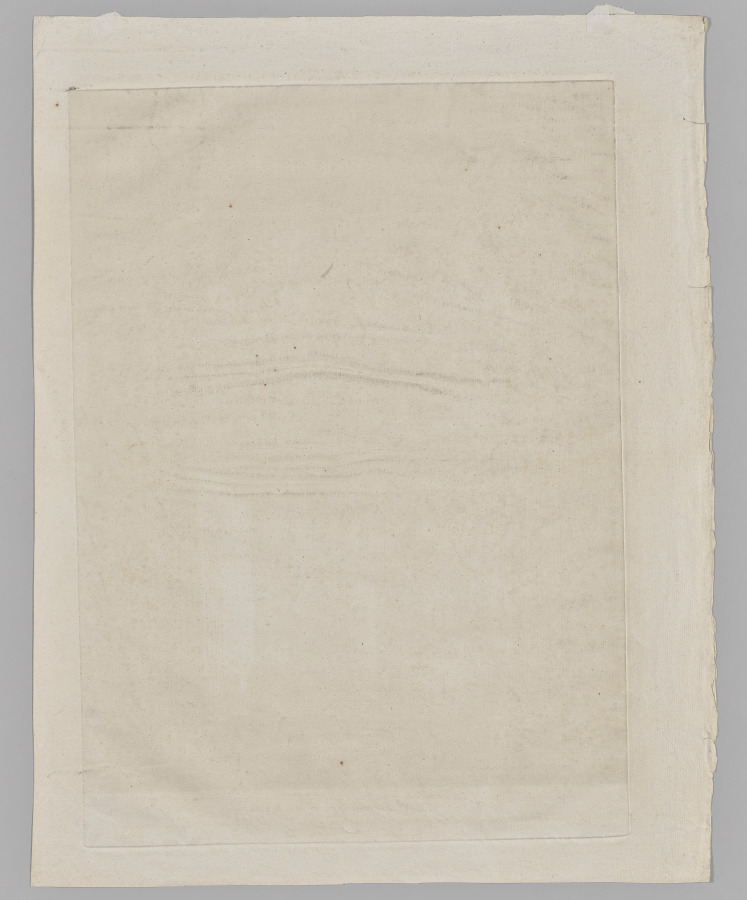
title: A View of the Vestibule of St. Peter at Rome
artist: Georges Francois Blondel (French, 1730–1800)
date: 1766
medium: mezzotint printed in sepia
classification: Print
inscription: Imprinted on recto: “A View of the Vestible ulf St. Peter at Rome”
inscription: Imprinted on recto: “G F Blondel Delin & Sculp”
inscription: Imprinted on recto: “To the Rt Hon’ble Elizabeth Countess of Northumberland This Plate is most Humbly Dedicated by her Ladyships most humble serv’t/Published according to Act by G F Blondel Panton Street/G F Blondel/Plate 3”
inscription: Watermark: Grand-Jésus stock of T. Dupuy, watermark Name of Jesus (IHS), countermark T Dupuy Fin Auvergne 1742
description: After returning from several years spent in Italy, the French printmaker George-Francois Blondel settled in London in order to take advantage of the English taste for images of Italian sites. This is one of a series of eight prints he published in 1766 depicting imagined and real Italian interiors. Using the relatively new technique of mezzotint, which creates velvety, dark tonal areas, as well as low vantage points, Blondel created towering, awe-inspiring spaces. For special patrons, he printed the plates in sepia ink, rather than in black; the CMA’s set includes two of these unusual sepia impressions.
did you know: Mezzotint was relatively new at the time this print was made and had yet to be utilized for such large plates of an architectural nature as seen here.